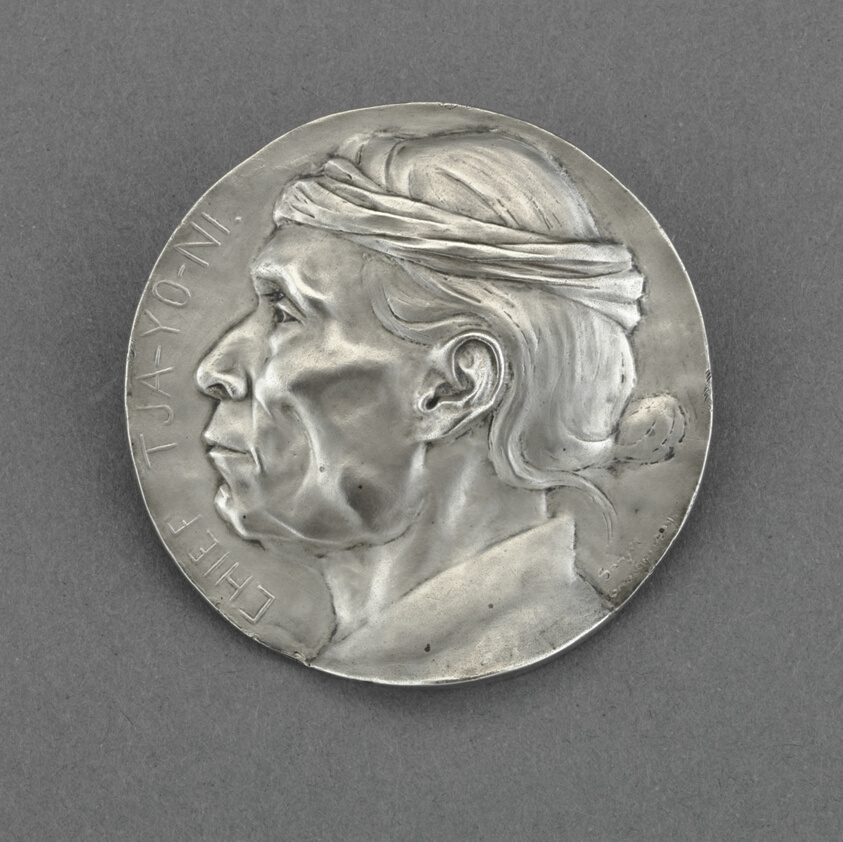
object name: Metalwork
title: Chief Tja-Yo-Ni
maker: Edward Warren Sawyer (American, 1876–1932)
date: 1904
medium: Silver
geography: United States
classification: medal; american arts; decorative arts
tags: Chicago